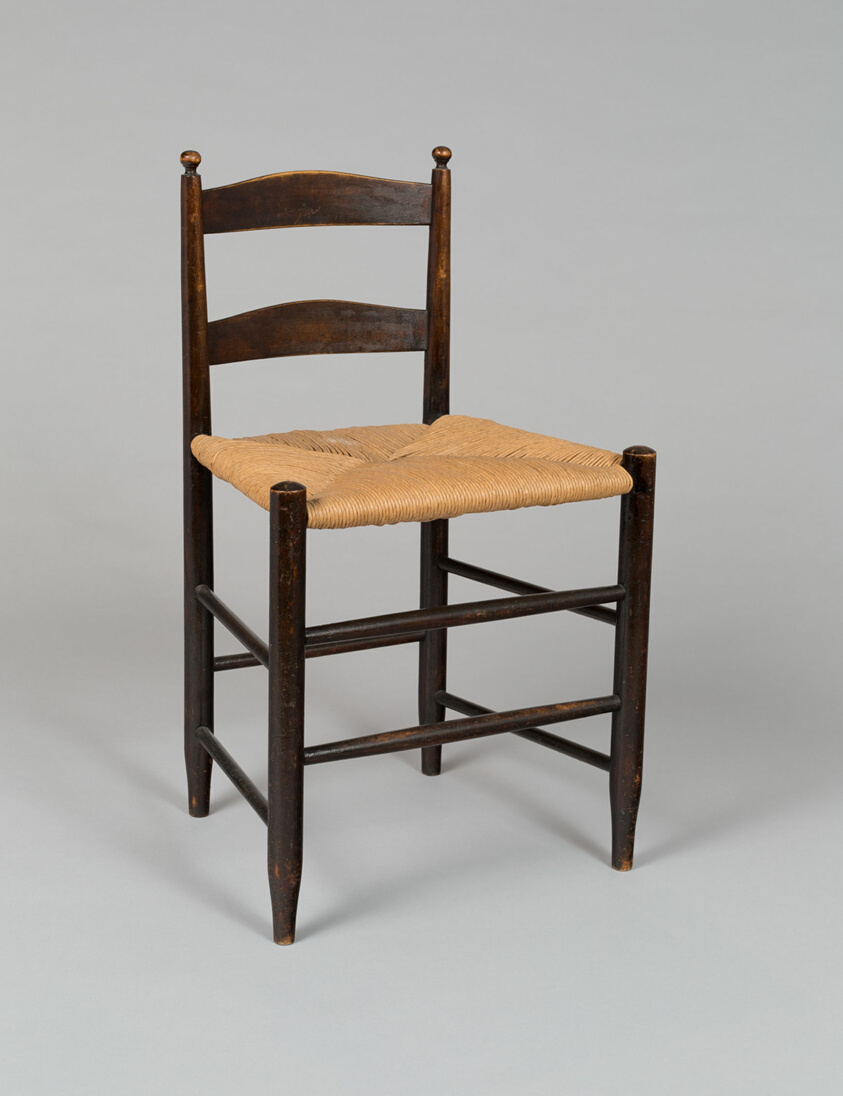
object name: Furniture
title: Side Chair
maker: Mount Lebanon Shaker Colony; American, late 19th cen.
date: c. 1873–83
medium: Maple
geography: New Lebanon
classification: seating; furniture; american decorative arts; american arts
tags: furniture